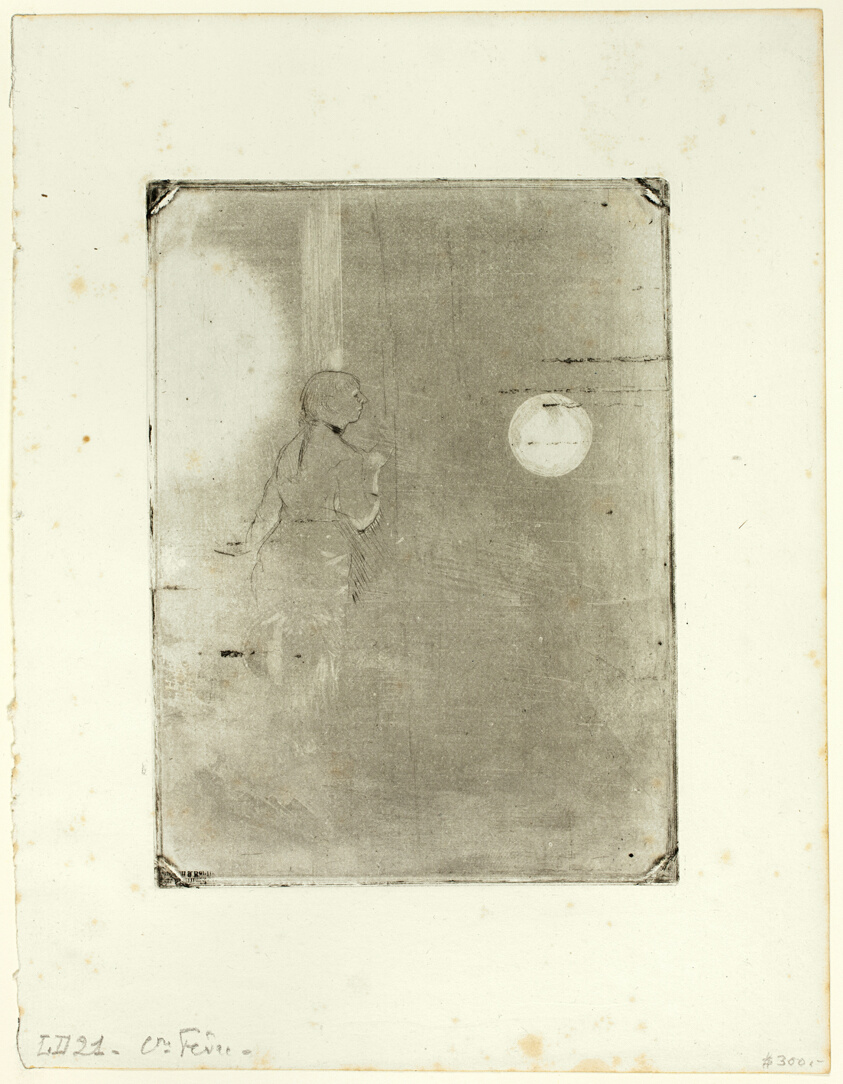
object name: Print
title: A Café-Concert Singer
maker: Edgar Degas; French, 1834-1917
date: 1877/78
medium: Drypoint and aquatint in black on ivory laid paper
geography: France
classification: drypoint; print; prints and drawing; paper